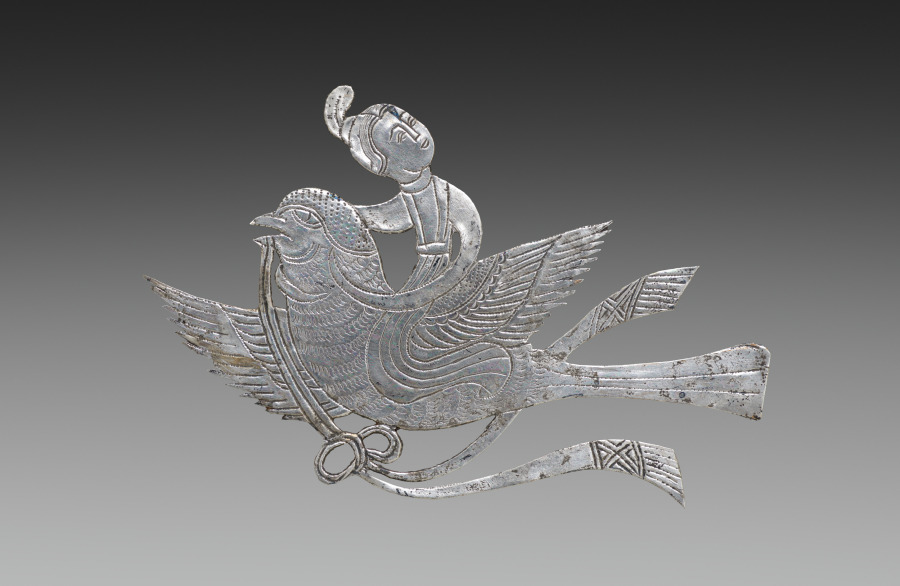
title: Inlay for a Mirror or Box: Lady on a Bird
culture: China, Tang dynasty (618-907) - Song dynasty (960-1279)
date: c. 900–1000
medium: beaten silver with chased details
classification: Metalwork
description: The p'ing-t'o technique of inlaying gold and silver foil on lacquer produced luxurious articles of elegance and fragility. These stray silver inlays were originally mounted on a mirror back or a cosmetic box whose lacquered surface has disintegrated. They combine auspicious symbols of Indian and Chinese origin--human-headed birds whose melodies filled the Buddhist paradise, and bird-riding deities who inhabited the skies of Taoist mythology. Like these imaginary beings, the lions were probably paired in a radial design; at least one has been lost.